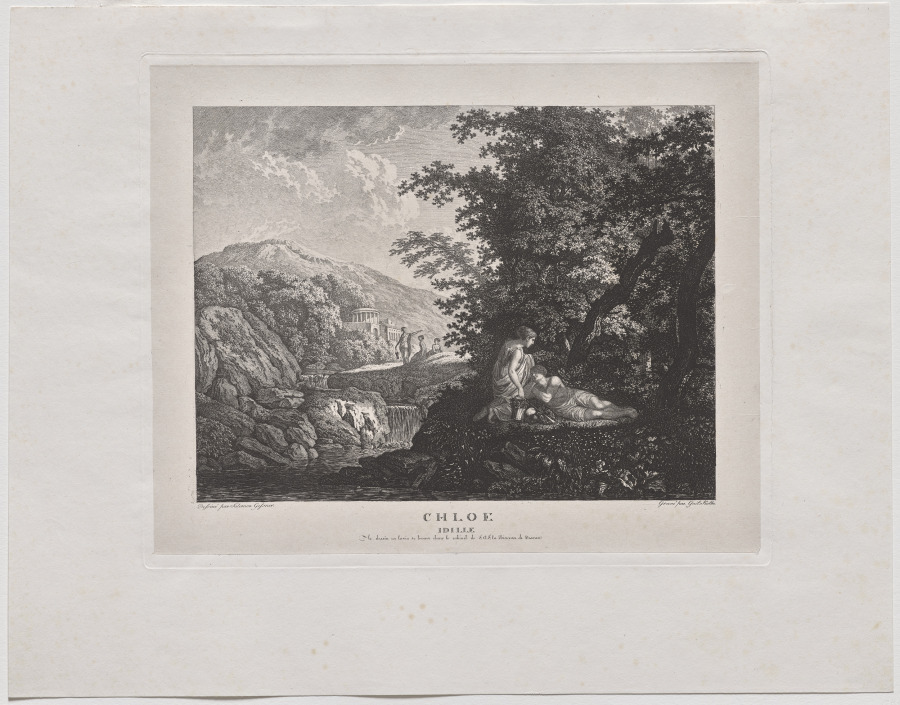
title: Chloe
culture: Germany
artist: Carl Wilhelm I Kolbe (German, 1757–1835)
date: 1805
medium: etching on chine appliqué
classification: Print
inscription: Imprinted on recto: "CHLOE"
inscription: Imprinted on recto: "IDILLE"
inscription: Imprinted on recto: "Le Dessin en lavis de trouvé dans le cabinet de S.Cl.S. la Princesse de Dessan"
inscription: Imprinted on recto: "Desiné par Salomon Gessner/Gravé par Guil Kolbe"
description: In this etching, Chloe, an alternate name for Demeter, Greek goddess of agriculture and fertility, reclines in a lush landscape complete with various figures, voluminous trees, a Greek temple, and a dramatic rockface. Less a narrative than a pastoral idyll, the scene evokes Romantic ideals circulating in Germany at the time that cast the relationship between humans and nature as one of direct, sometimes spiritual, experience. Carl Wilhelm Kolbe’s expert etching technique allows for both sweeping views and minute detail in one composition.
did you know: This work was printed on a chine collé (or appliqué), a sheet of translucent paper that has a slight sheen, affording a precious quality to the print.